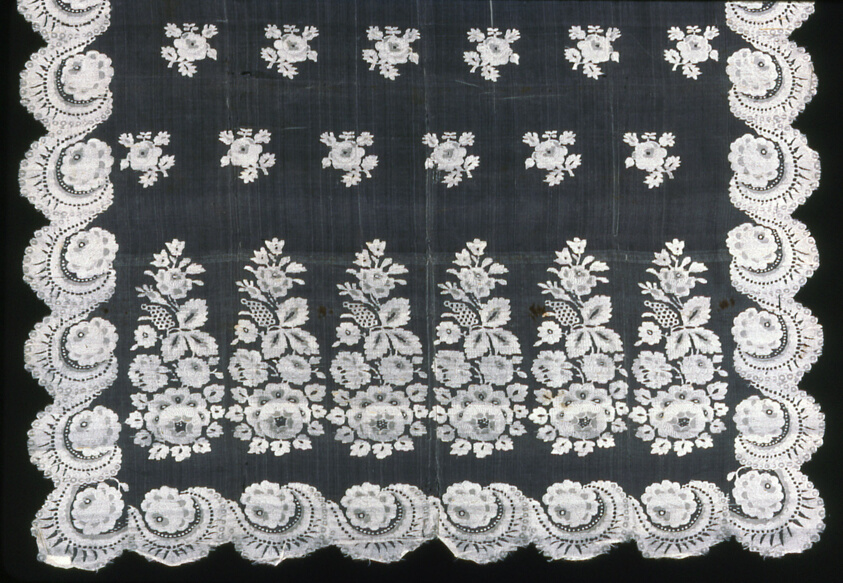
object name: Costume and Accessories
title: Shawl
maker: England, Spitalfields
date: c. 1815/20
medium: Silk, plain 1:1 gauze weave with supplementary brocading wefts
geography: Spitalfields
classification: textile; weaving; costume